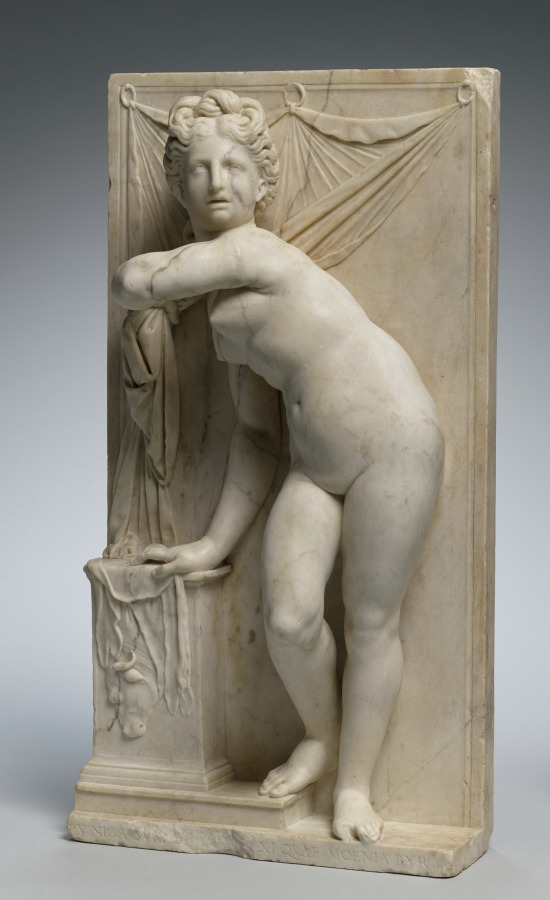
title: Dido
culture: Italy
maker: Aurelio Lombardo (Italian, 1501–1563)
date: c. 1525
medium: marble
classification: Sculpture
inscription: PVNICA SVM [DIDO ERE]XI QVAE MOENIA BYRSA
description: Artists customarily portrayed Dido as a forlorn lover abandoned by the Trojan hero, Aeneas, but here she is a conquering queen. Dido draws aside an oxhide curtain, a reference to the mythical founding of Carthage (in modern-day Tunisia, North Africa), when she was given an oxhide to demarcate granted land. By cutting it into thin strips she was able to encircle the future city. Dido was likely created for display in a studiolo, a place of study featuring refined works of art appreciated by humanist scholars and aficionados during the Renaissance.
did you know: Dido’s nudity and hairstyle are allusions to ancient Greek images of Aphrodite.